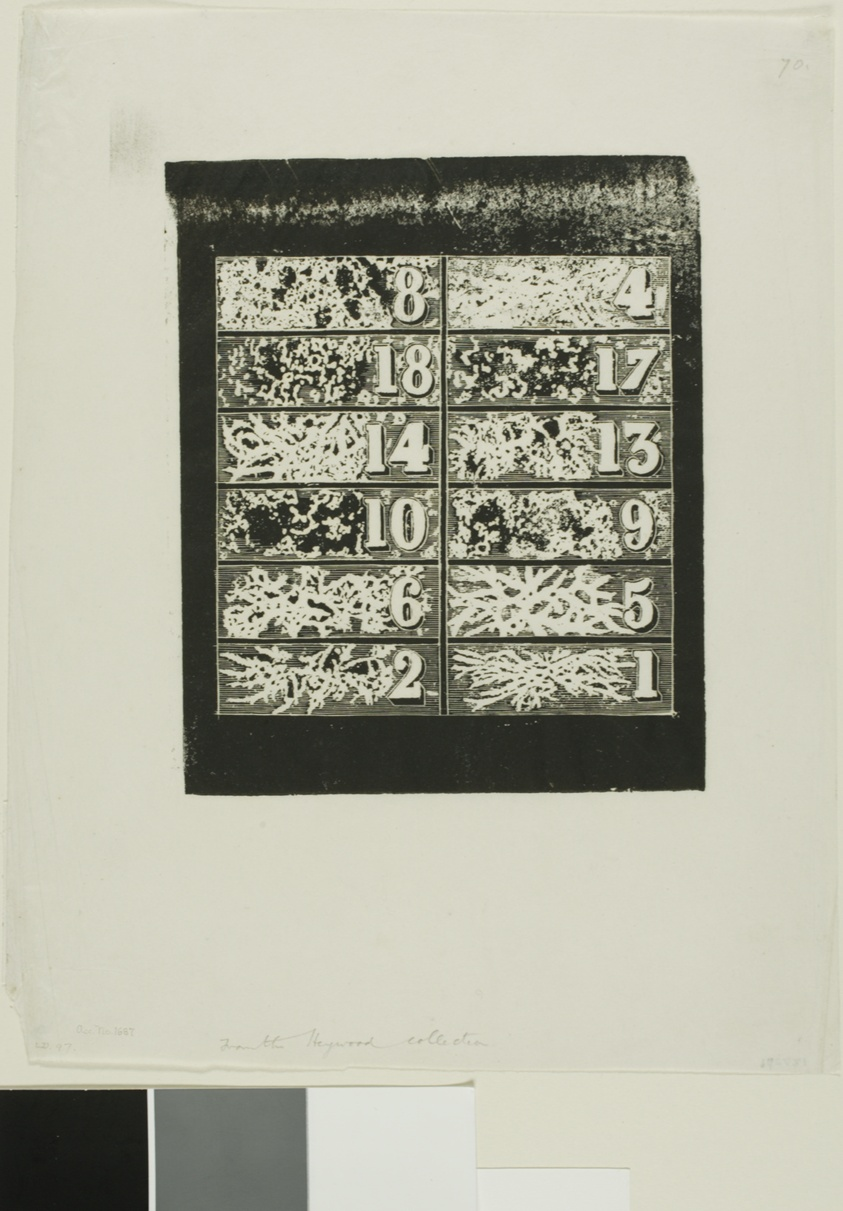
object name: Print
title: Study for Share Certificates in a Fraudulent Franco-Californian Company, No. 1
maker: Charles Meryon (French, 1821-1868)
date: 1855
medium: Gillotage in black on ivory wove paper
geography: France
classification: relief etching; print; prints and drawing